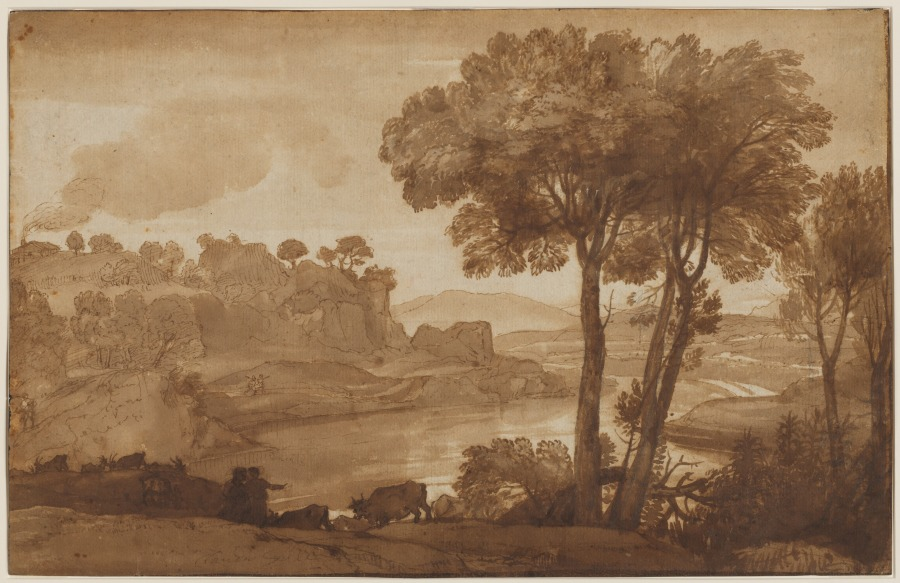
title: View of the Acqua Acetosa (recto); David and Goliath (verso)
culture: France, 17th century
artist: Claude Lorrain (French, 1604–1682)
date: c. 1645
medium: pen and brown ink and brush and brown wash over graphite, framing lines in brown ink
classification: Drawing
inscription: verso, lower left, in brown ink: beau peisage de claude Le Lorrain; lower left, in graphite: David; lower right, in graphite: Golia; upper center, in graphite: No 2599; lower center, in graphite: Claude Lorraine / From the Collection of / Lord Brownlow (The Belton / House Collection) / Signed Claudio Gellée.; lower left, in red watercolor: 55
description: This drawing represents a view of the famous Acqua Acetosa, a mineral spring that until the 19th century provided the favored drinking water of Romans who believed in its healing powers. Although topographically accurate, the sheet is not a plein-air study but a vision of an imagined Arcadian world carefully rendered by Gellée, one of the most original painters of the 17th century. The French-born artist spent his career painting and drawing the Roman Campagna and the Neopolitan coastline. Sublimely beautiful pen-and-ink and wash drawings such as the example here reveal the artist's highly poetic response to the natural world and his unparalleled sensitivity to light.